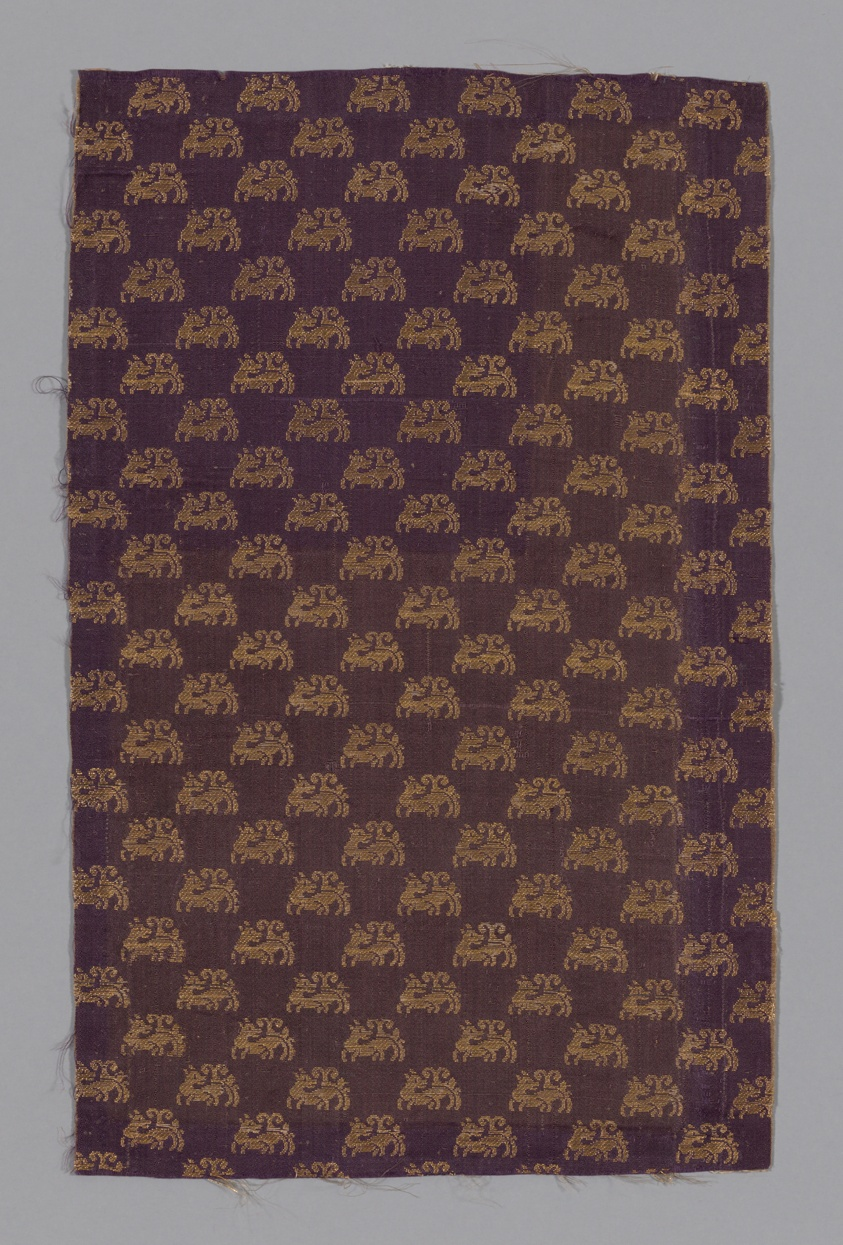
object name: Textile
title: Fragment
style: late edo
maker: Japan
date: late Edo period (1789–1868)/ Meiji period (1868–1912), 19th century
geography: Japan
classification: textile; weaving